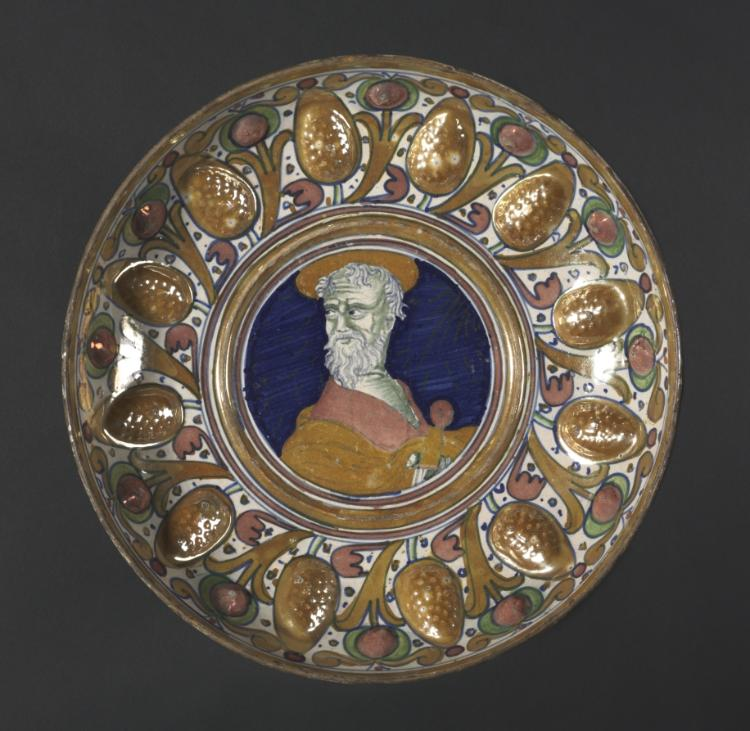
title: Bowl: Bust of Paul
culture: Italy, 16th century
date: c. 1535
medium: tin-glazed earthenware with gold and red lustre (maiolica)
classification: Ceramic